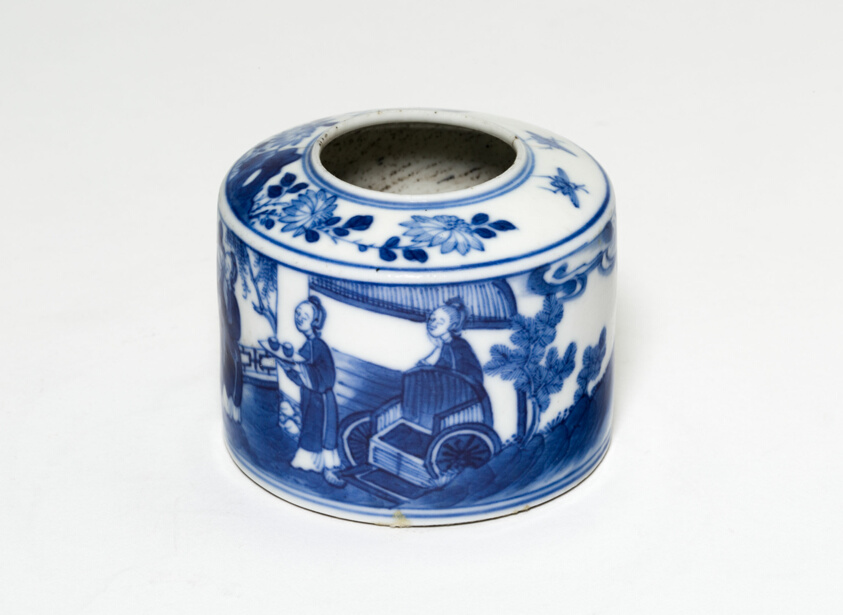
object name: Vessel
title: Cylindrical Water Jar with Figures in a Landscape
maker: China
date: Qing dynasty (1644–1911), Qianlong period (1736–1795)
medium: Stoneware painted in underglaze blue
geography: China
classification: stoneware; asian art; ceramics